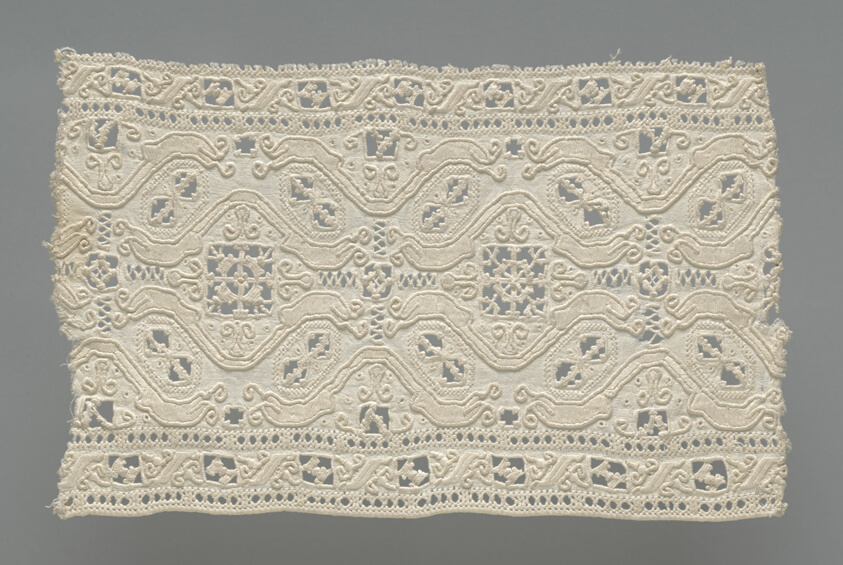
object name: Textile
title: Fragment (From a Border)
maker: Italy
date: 1601/50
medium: Linen, plain weave; embroidered in padded overcast and satin stitches; cut and drawn work embroidered in double hem, double faggot, hem, and overcast stitches; eyelet holes; needle lace fillings including buttonhole and double buttonhole bars decorated with buttonhole collar and bullion picots, darned and overcast bars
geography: Italy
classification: textile; needlework (visual works)